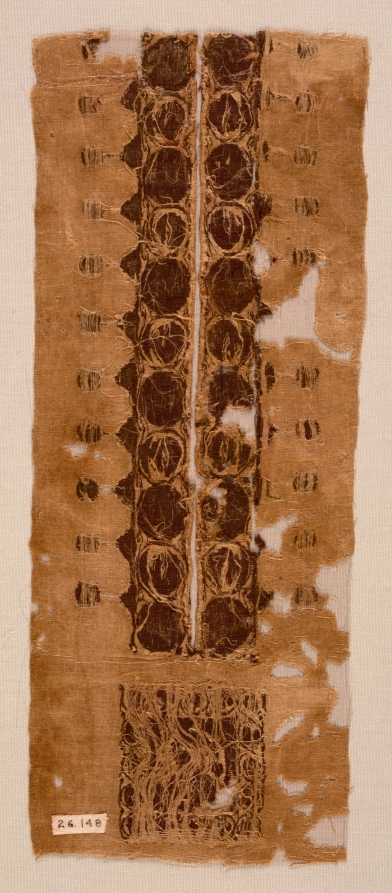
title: Neck and Shoulder Decoration from a Tunic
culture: Egypt, Byzantine period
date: late 400s - 500s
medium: plain weave with slit-tapestry weave and supplementary weft wrapping; dyed wool, undyed linen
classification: Textile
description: This tunic fragment with a straight neck opening in the center and one surviving shoulder square may have symbolically protected the wearer from danger. This is suggested by interlacing knots. These delicate decorations in small deep purple discs alternate with human busts in roundels.